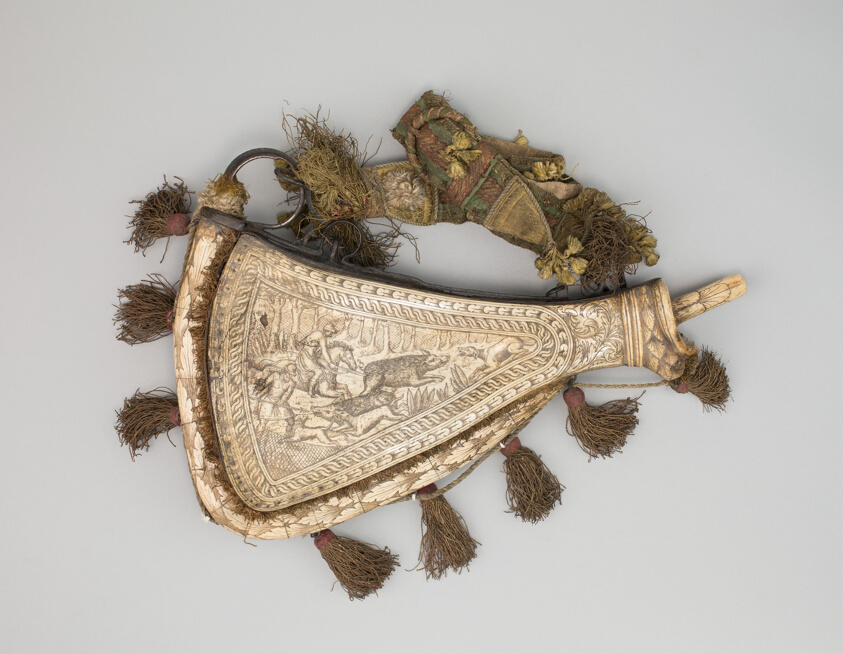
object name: Arms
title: Powder Flask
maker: German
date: Mid-17th century or 19th century in the 17th century style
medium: Antler, bone, leather, iron, textile, and gold thread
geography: Germany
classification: firearm-accessory; arms; arms and armor